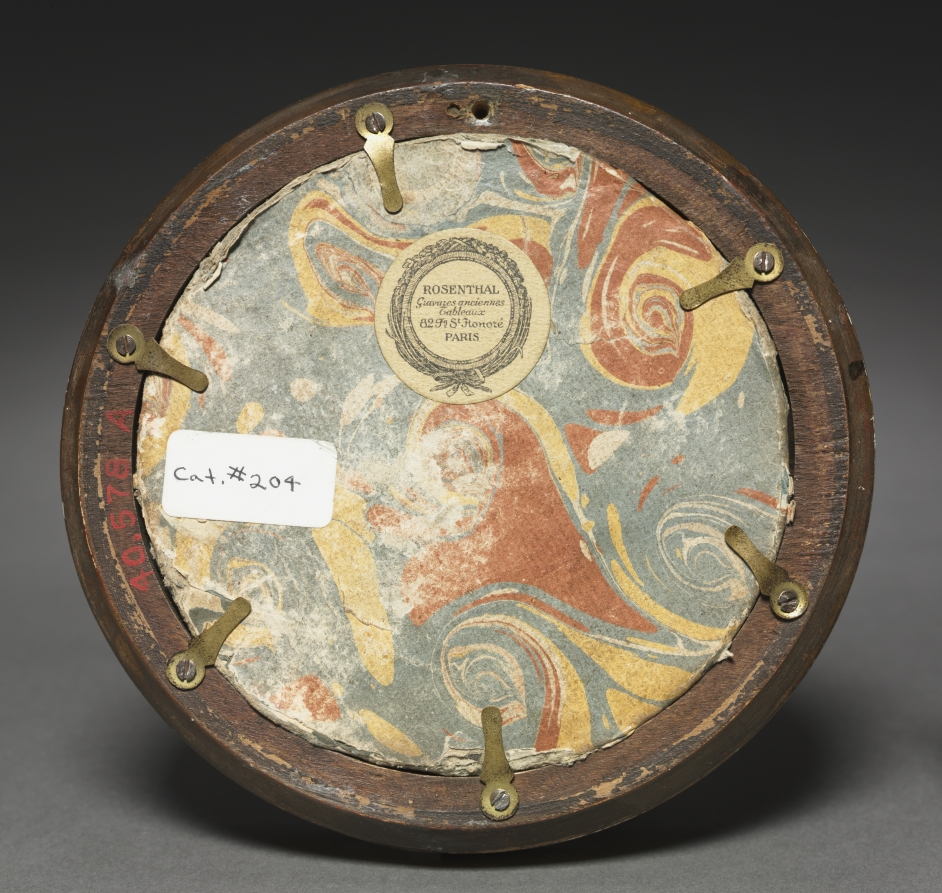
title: Portrait of Benjamin Franklin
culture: France, 18th century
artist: Giovanni Battista Nini (Italian, 1717–1786)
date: 1777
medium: terracotta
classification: Sculpture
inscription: inscribed along the circumference: B. FRANKLIN. AMERICAIN; inscribed below: NINI F 1777 [with coat-of-arms].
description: Scholars debate whether Nini met Benjamin Franklin personally or based the nine versions of his portrait on drawings by artist Thomas Walpole (British, 1755-1840). In this particular cast, Nini presents Franklin with a fur hat, which may be an allusion to French philosopher Jean-Jacques Rousseau, suggesting a comparison between the inventor and the philosopher and their roles in revolutionary politics on both sides of the Atlantic. Nini copied Franklin's fur hat from a portrait of Rousseau by Allan Ramsay (Scottish, 1713-1784). The small crest below Franklin's left shoulder shows a bolt of lightning striking an iron bar held by a hand, a reference to Franklin's discovery of the lightning rod and electricity.